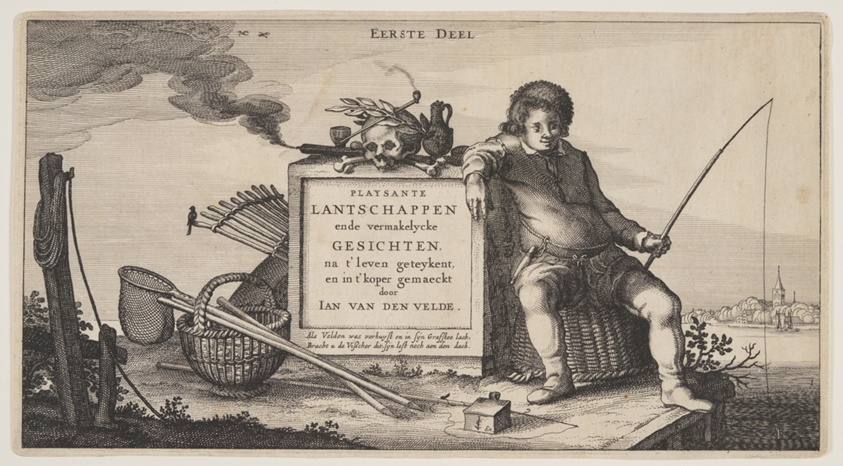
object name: Print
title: Title page, from Landscapes (Playsante Lantschappen)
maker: Attributed to Claes Jansz. Visscher II (Dutch, 1586-1652); after Jan van de Velde II (Dutch, c. 1593-1641)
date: c. 1641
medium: Etching, with engraving, on ivory laid paper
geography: Netherlands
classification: etching; paper; print; prints and drawing